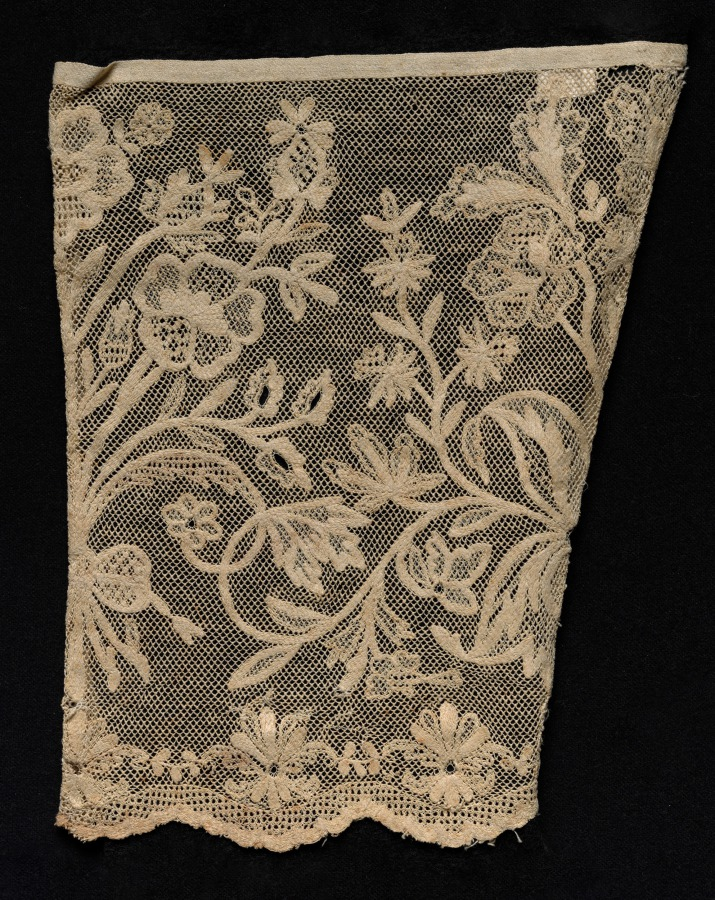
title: Cuff with Floral Vines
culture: Unassigned, 1800s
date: 1800s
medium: Bleached linen (est.): needle lace, filet/lacis (knotted ground and darned in one direction)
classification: Lace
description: In this lace cuff (one of a set, see 1936.226), scrolling vines with budding flowers emerge from a tied bow, creating a stylized bouquet. A scrolling vine with budding vegetation or a tendril motif is a recurring pattern in needle lace. The frequent use of the motif, adapted in lace from different centuries and regions, suggests that it was found in a pattern book.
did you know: From the 15th century, lace cuffs were among the most popular ways to wear and display this costly textile.